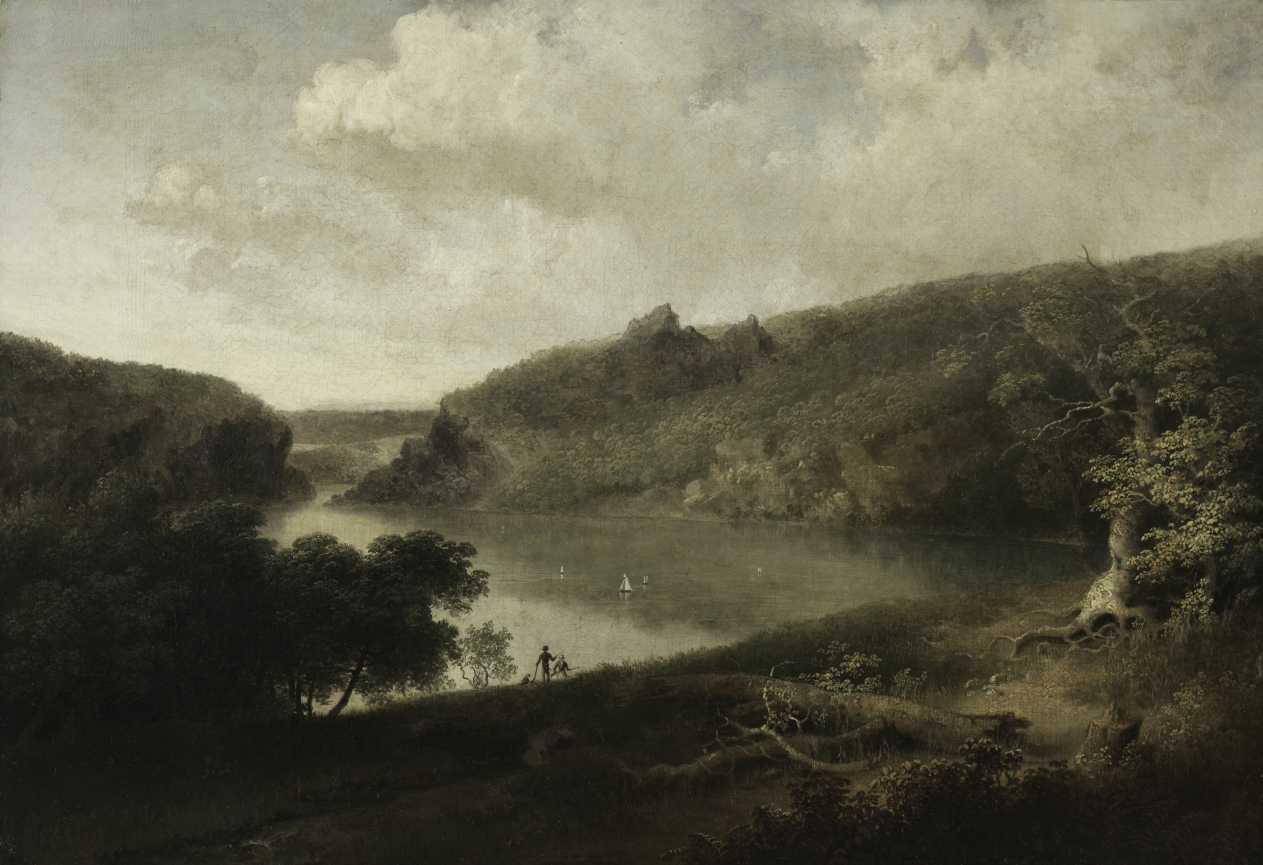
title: View of a Lake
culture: America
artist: Thomas Doughty (American, 1793–1856)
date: c. 1830s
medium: oil on canvas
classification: Painting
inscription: Signed lower right: "T DOUGHTY"; inscribed on back of canvas in ink: "An original painting by DOUGHTY"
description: Contrasting the many American landscape painters who conveyed nature's power through raging storms and blasted trees, Doughty emphasized the quiet power of the outside world in his idyllic paintings. Largely self-taught, he often drew from nature and skillfully transformed his detailed observances into soft, poetic depictions of the landscape. This work exhibits Doughty's penchant for inserting small figures in the center of the middle ground. The scale of the two boys on the lake's edge allows the viewer to focus on the expansive scenery, thereby emphasizing the diminutive nature of humankind in relation to the vast landscape.